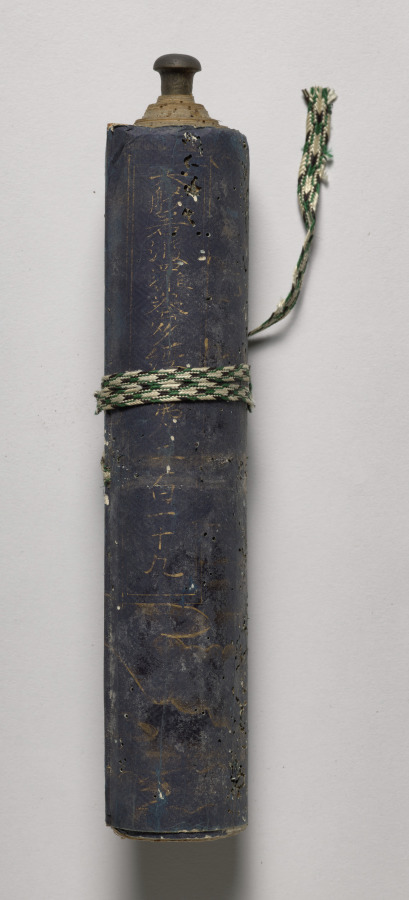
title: Volume from the Great Perfection of Wisdom Sutra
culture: Japan, Heian period (794–1185)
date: late 1100s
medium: Handscroll; ink and gold on dyed paper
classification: Manuscript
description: This scroll is part of the 600-volume Great Perfection of Wisdom Sutra. The sacred text addresses the perfection of wisdom and the nonsubstantiality of all phenomena, or the emptiness of all things. It takes the form of Shakyamuni Buddha’s preaching at four locations. This scroll is from the Perfection of Wisdom in 100,000 Lines, which occupies the first 400 volumes. At one time, religious clergy kept all the scrolls in a lacquered wood repository on view nearby. They are now too fragile to open and we will conserve them over time.